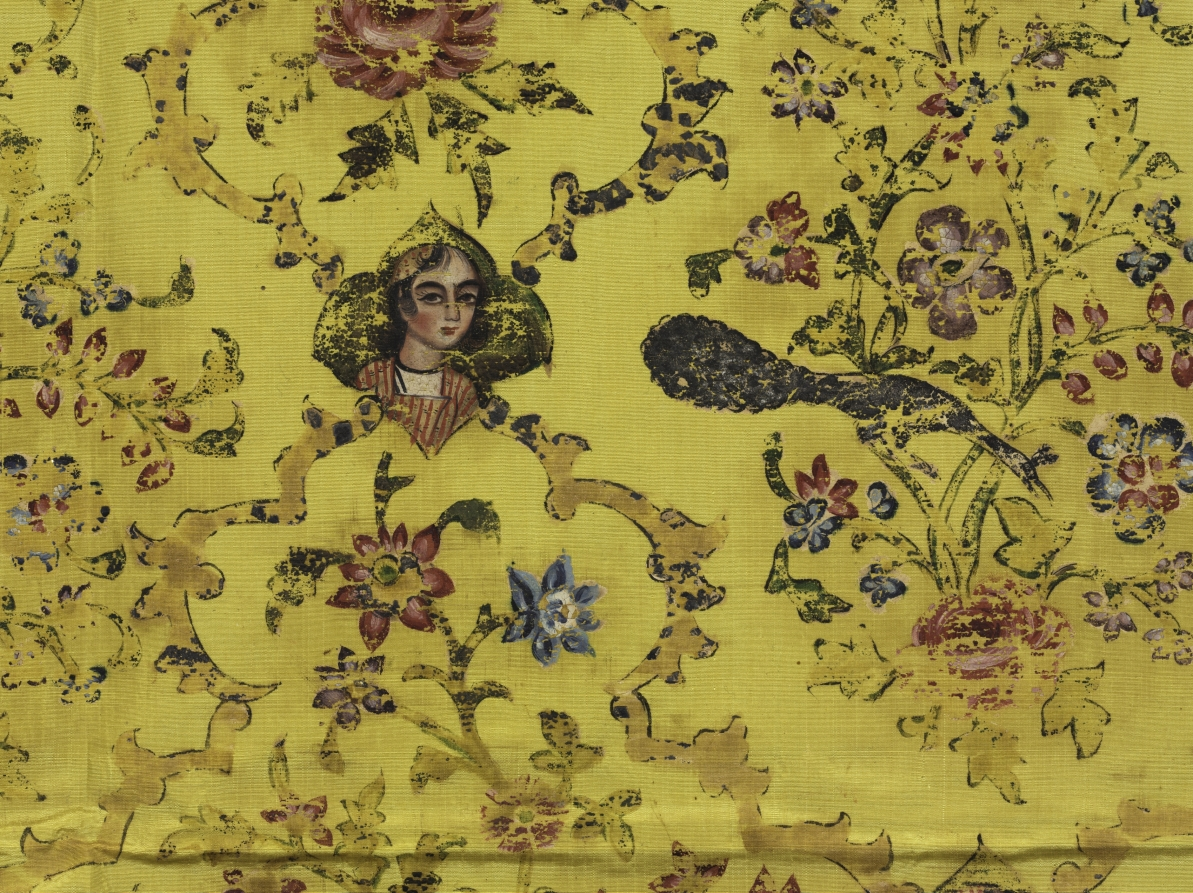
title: Wall cover with flora, peacocks, and portrait medallions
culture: Iran, Qajar period (1779-1925)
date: 1800s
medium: taffeta, hand-painted, block-printed: silk and pigments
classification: Textile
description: The European fashion of installing Chinese export silks with painted decoration as luxurious wall coverings may have inspired this exceptional Iranian silk. European engravings, which had flooded the Iranian market by the 19th century, most likely inspired the pattern. This rare silk fabric with painted figural and foliate decoration may have been a luxurious wall covering in a palace or grand mansion in the city of Kashan where mural paintings display similar 19th-century designs. Glistening silver pigment originally formed the palmette-leaf compartment outlines (now mostly deep yellow) that display colorful blossoming plants enlivened with now tarnished silver peacocks. At their junctures, portrait medallions of Iranian princesses are distinctly Qajar in attire and style, as are the composite blossoming plants.